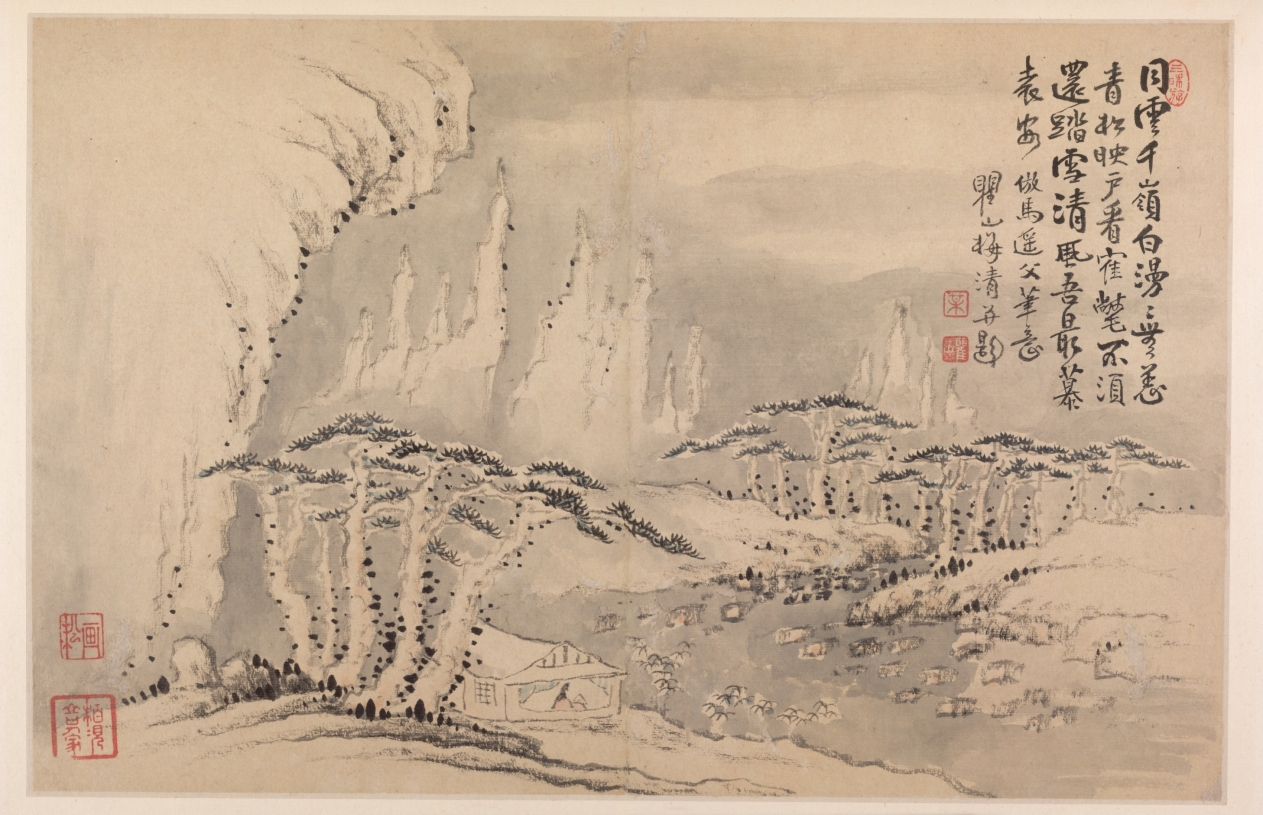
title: Landscapes in Various Styles after Old Masters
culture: China, Qing dynasty (1644-1911)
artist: Mei Qing (Chinese, 1623–1697)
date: 1690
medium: album leaf: ink and color on paper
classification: Painting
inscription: [印] 三昧遊. 同雲千嶺白漫漫，無恙青松映戸看。 鶴氅不須還踏雪，清風我最慕袁安。 仿馬遠父筆意。瞿山梅清並題。[印] 梅; 瞿山 [印, 左下]画松; 柏梘山口人家.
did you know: Mei Qing’s visits to Huangshan were in the spring and summer, so this wintry scene was a product of his imagination.